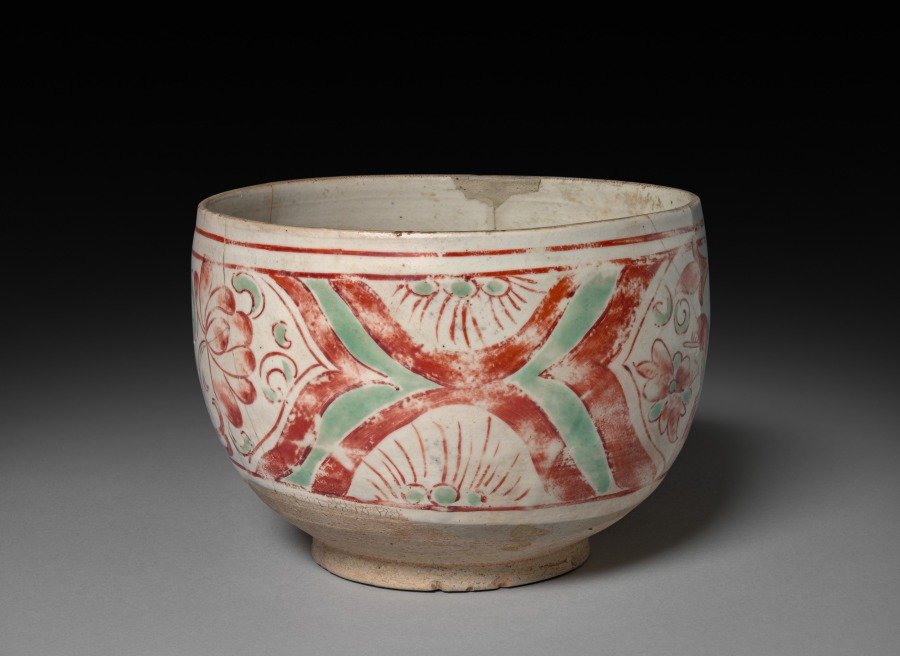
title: Bowl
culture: China, Jin dynasty (1115-1234) - Yuan dynasty (1271-1368)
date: 1200s–1300s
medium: buff stoneware with underglaze slip application and overglaze enamel decoration; Cizhou ware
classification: Ceramic